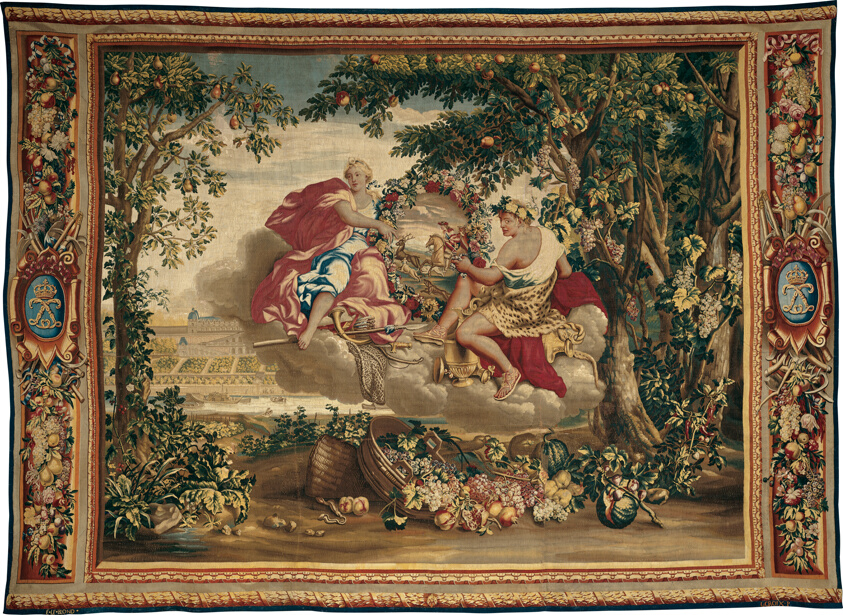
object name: Textile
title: Autumn, from The Seasons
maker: After a design by Charles Le Brun (1619–1690); Woven at the workshop of Etienne Le Blond (1652–1727) and Jean de La Croix (1628–1712) at the Manufacture Royale des Gobelins; France, Paris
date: 1700/20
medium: Wool and silk, slit and double interlocking tapestry weave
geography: Paris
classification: weaving - tapestry; textile